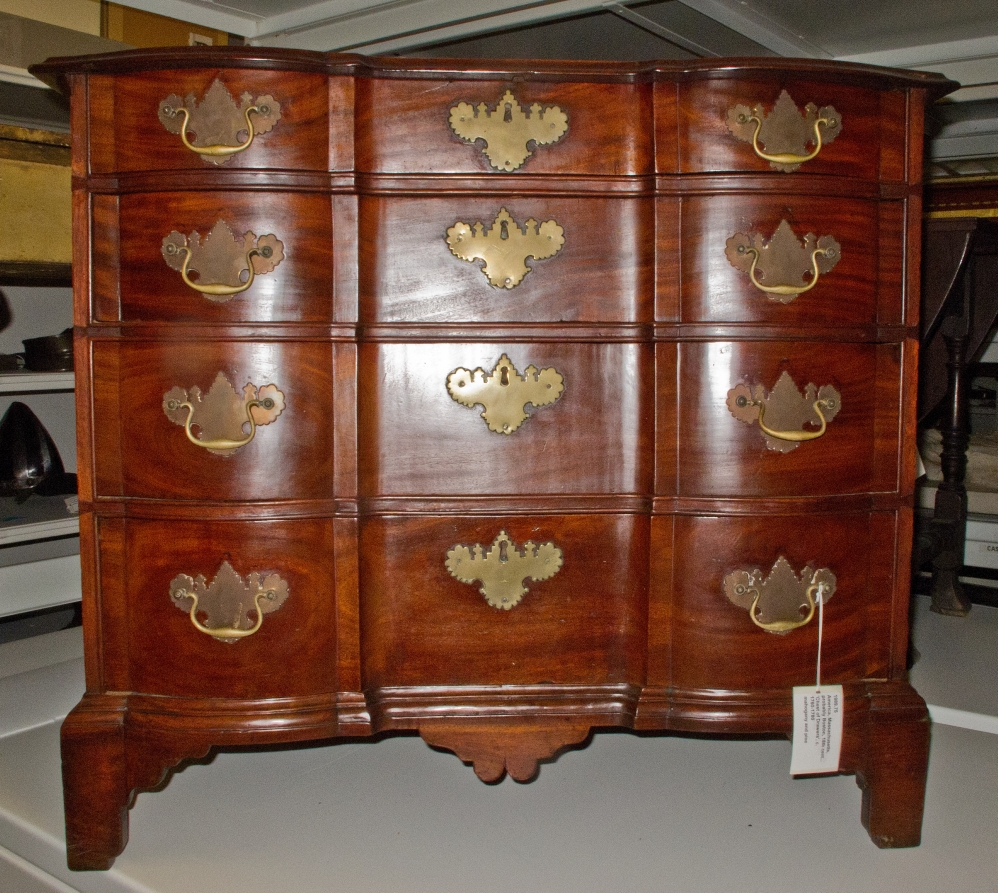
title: Chest of Drawers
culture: America, Massachusetts, probably Boston, 18th century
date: c. 1760–1780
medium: mahogany and pine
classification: Furniture and woodwork